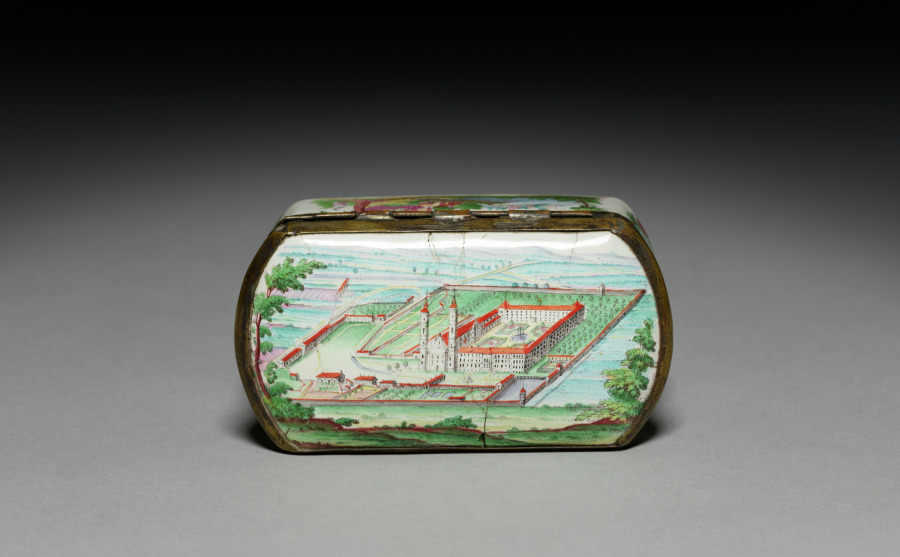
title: Snuff Box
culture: Austria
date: mid-1700s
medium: enamel on copper with metal mounts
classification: Miscellaneous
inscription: on interior of lid in a rococo cartouche: "S Hieronimus."